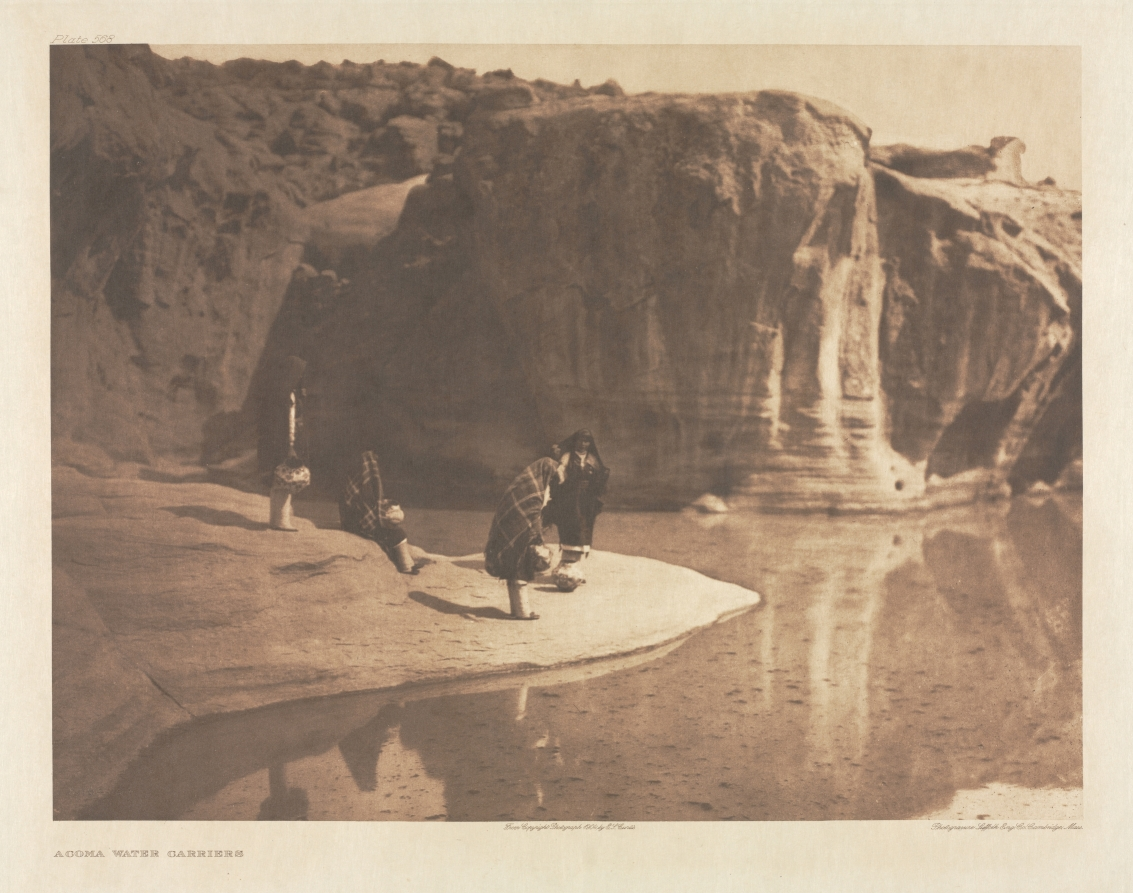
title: Portfolio XVI, Plate 568: Acoma Water Carriers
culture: America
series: The North American Indian: being a series of Portfolios picturing and describing the Indians of the United States, the Dominion of Canada, and Alaska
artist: Edward S. Curtis (American, 1868–1952)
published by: The University Press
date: 1904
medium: photogravure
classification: Portfolio